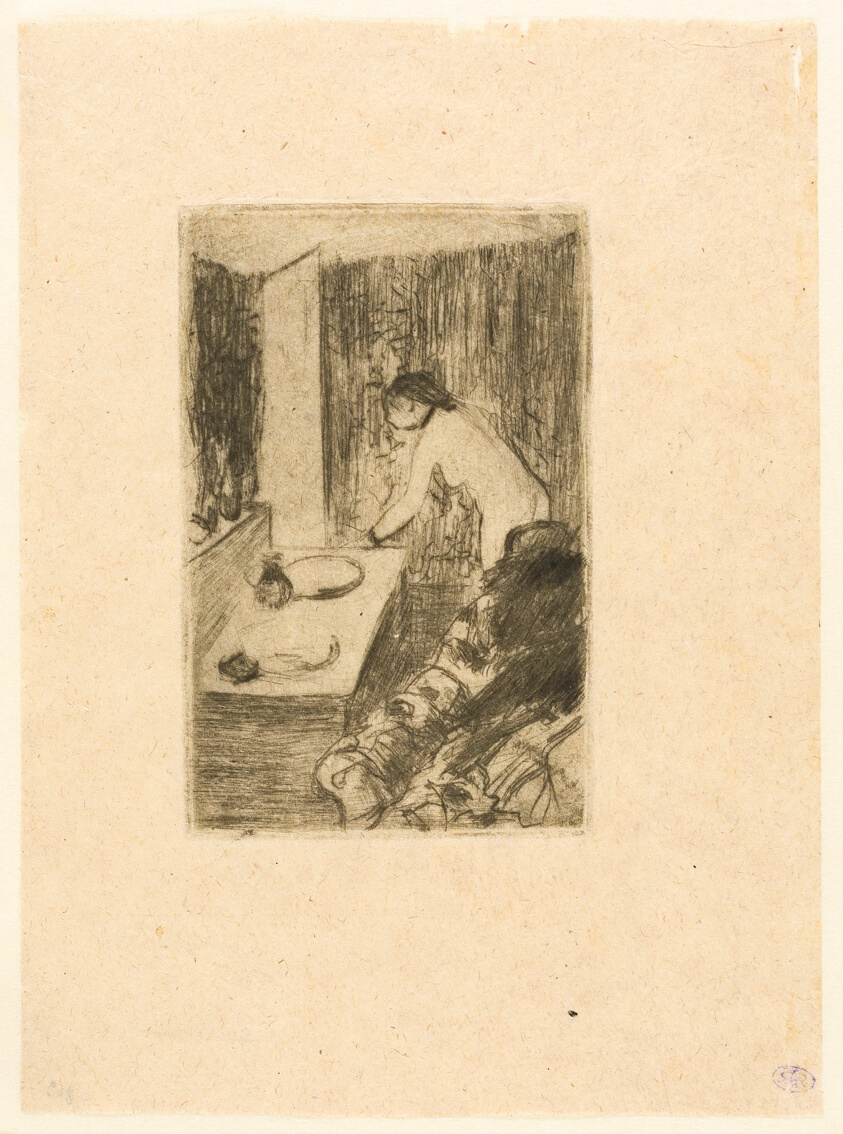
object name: Print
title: The Little Dressing Room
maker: Edgar Degas; French, 1834-1917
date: 1879–80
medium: Drypoint in black on tan Japanese paper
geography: France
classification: drypoint; print; prints and drawing; paper